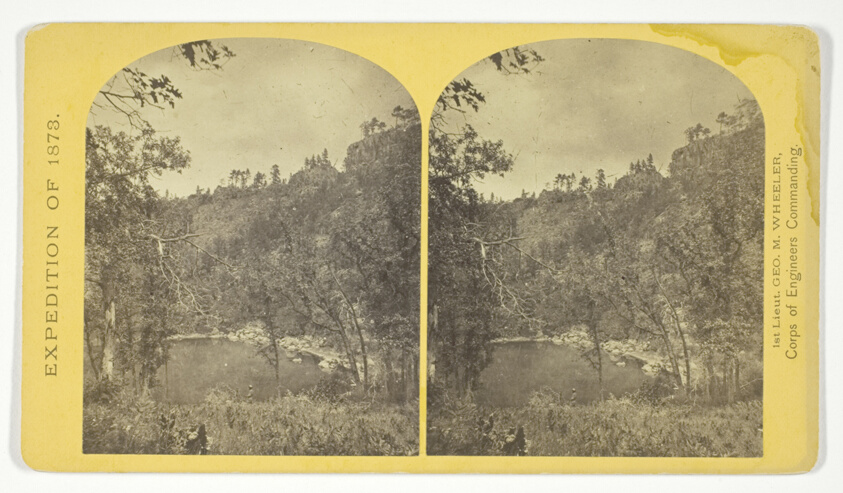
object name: Photograph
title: Apache Lake, Summit of Sierra Blanca Mountains, about 35 miles east from Camp Apache, Arizona, and 10.500 feet above sea-level. This lake is similar to many found in the western mountains, No. 30 from the series "Geographical Explorations and Surveys West of the 100th Meridian"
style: 19th century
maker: Timothy O'Sullivan (American, born Ireland, 1840–1882); commissioned by George Wheeler for the War Department, Corps of Engineers, U.S. Army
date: 1873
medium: Albumen print, stereo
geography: United States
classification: stereograph (albumen); photography; photograph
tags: Collected by Hugh Edwards, Geographical Explorations and Surveys